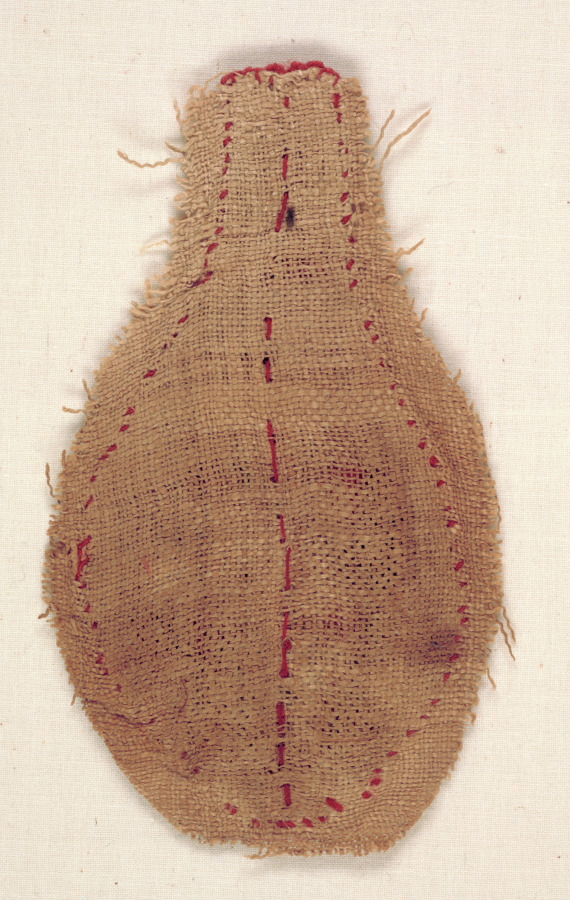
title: Ornament, Probably from a Tunic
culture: Egypt, Byzantine period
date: 400s - 500s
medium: tapestry weave: wool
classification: Textile